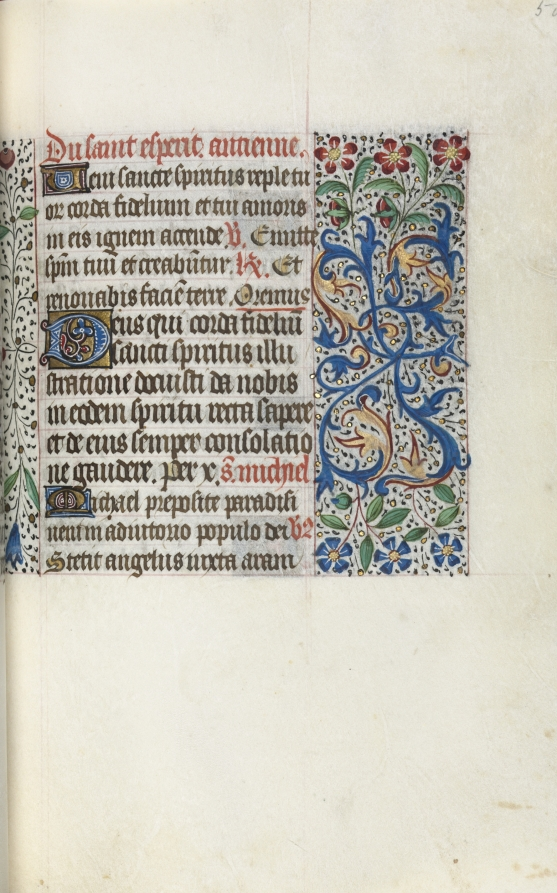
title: Book of Hours (Use of Rouen): fol. 50r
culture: France, Rouen, 15th century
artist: Master of the Geneva Latini (French, active Rouen, 1460–80)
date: c. 1470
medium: ink, tempera, and gold on vellum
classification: Bound Volume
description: In the late 1400s and early 1500s Rouen was an established and important center of book production. The city’s cathedral had a wealthy chapter that spent large sums of money to commission books and to maintain its extensive library. The stationers and booksellers would have likely been concentrated in or near the cathedral precinct. This artist, named after a manuscript now in Geneva, was Rouen’s principal illuminator during the second half of the 1400s.